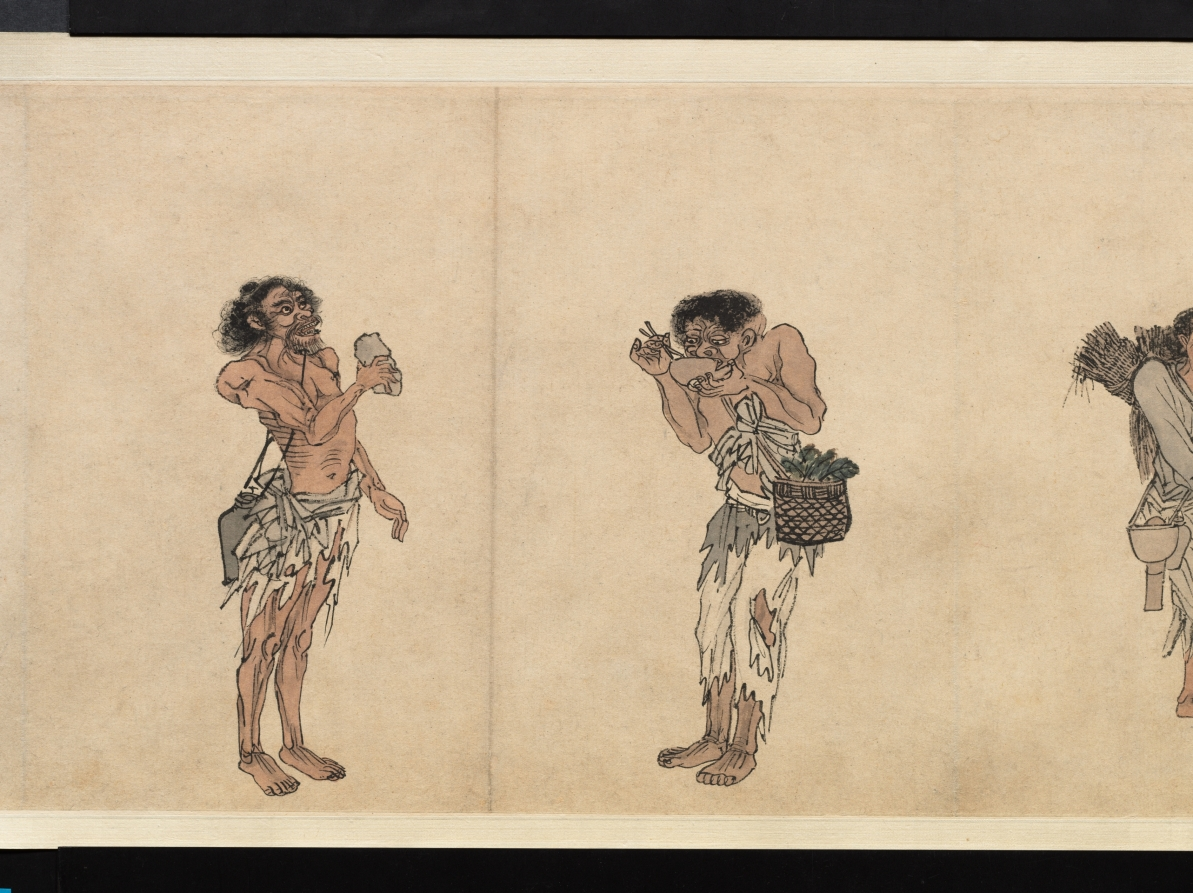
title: Beggars and Street Characters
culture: China, Ming dynasty (1368–1644)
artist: Zhou Chen (Chinese, c. 1450–c. 1536)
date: 1516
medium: Handscroll; ink and light color on paper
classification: Painting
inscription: 題: 周臣流氓圖. 古堇趙鶴琴 [印] 老鶴臨池; 鵝池軒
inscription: 正德丙子秋七月，閒窗無事 ，偶記素見市道丐者種種態度。乘筆硯之便，率爾圖寫。雖無足觀，亦可以助警勵世俗云。 東邨周臣記 [印]東邨; 舜卿; 鵝場散人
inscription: 吳中東邨周君，善丹青，尤長於人物。此圖其所見盛市丐者之狀種種，各盡其態，觀者絕倒。嗟乎，今之晝夜乞哀以求富貴者，安得起周君而貌之耶。臥雲徵君出示，余漫題其後。 甲子歲十月吳門黃姬水 [印] 士雅山人; 另一印不詳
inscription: 是冊凡數種。其飢寒流離疲癃殘疾之狀，種種之異。觀此而不惻然心傷者，非仁人也。計正德丙子逆瑾之流毒已數年。而[江]彬 [錢] 寧輩肆虐方熾。意分符剖竹諸君，亦鮮有能撫字其民者。然則舜卿此作，殆與鄭君 流民圖同意。其有補於治道者不淺，要不可以墨戲忽之也。 長洲張風翼題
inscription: 東村此筆，蓋圖寫飢寒乞丐之態，以警世俗耳。而質山 [黃姬水]欲其寫昏夜乞哀，而靈墟[張鳳翼]則擬之於安上門圖。二君之見，其各有所指哉。昔唐六如每見周筆，輒稱曰：周先生！蓋深服其神妙之不可及。若此冊者，信非他人可能而有符於六如之心伏矣。豈易得耶。若黃、張之指，則又論於畫之外，不在於形似筆墨之旨也。 萬歷丁丑十二月三日 茂苑文嘉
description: Zhou Chen from Suzhou provides rare depictions of impoverished people that once filled the city’s markets and streets. Despite Suzhou’s prosperity, its rapid growth polarized society, including the wealthy and those who had deserted their farmlands, who were without homes, unemployed, or sick. Amid these are figures who inspire fear rather than empathy. The painting may thus be informed by local practices at the end of the lunar year, in which street beggars, in exchange for food or money, would dress up like ghosts and demons to drive out evil forces.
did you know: Although Zhou Chen's original composition was an album of 24 figures, today it is mounted as two handscrolls, one in the Cleveland collection and one in the Honolulu Museum of Art.